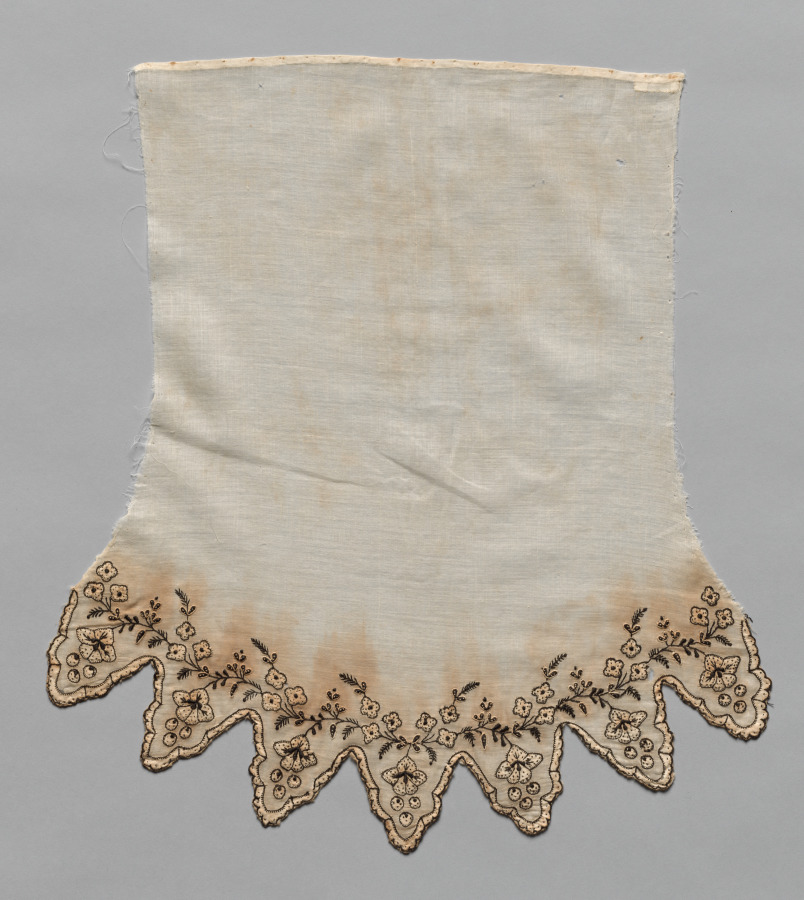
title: Sleeve (one of two)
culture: America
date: 1800s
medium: Plain weave cotton with appliqué and embroidery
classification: Embroidery